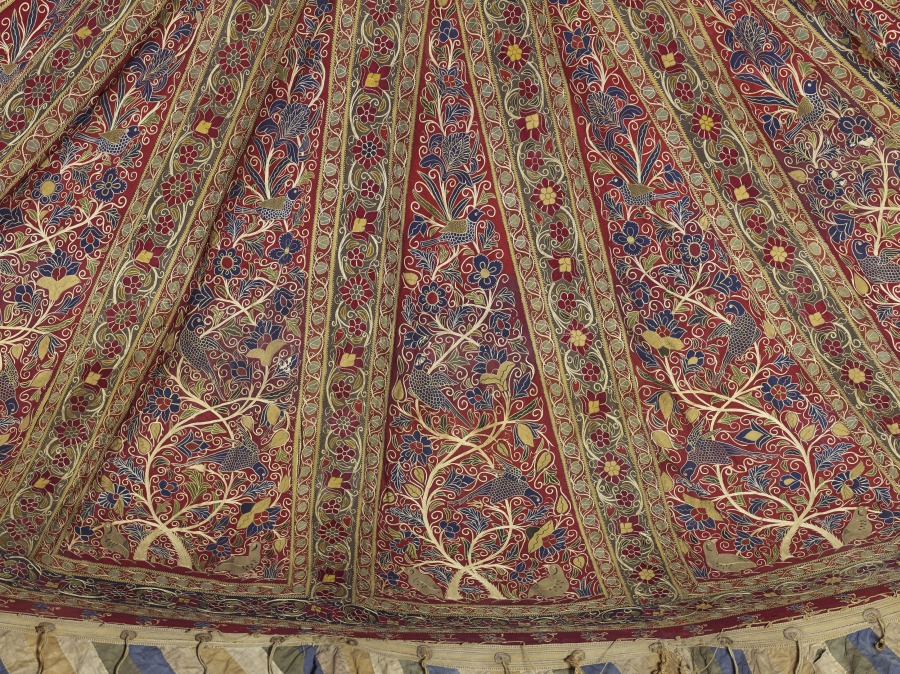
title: Royal Round Tent made for Muhammad Shah (Roof)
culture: Iran, Rasht, Qajar period (1779-1925)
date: 1834–48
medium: Interior: wool: plain weave, inlaid work; silk: embroidery, chain stitch; tape, leather; Exterior: cotton, wool: plain weave; rope, iron ring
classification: Textile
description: Royal tents were potent symbols of authority, wealth, and power throughout the greater Middle East. Rulers owned thousands of tents. They were used for shelter, shade, and innumerable functions in tent compounds that were essential for imperial ceremonies, travel, and military campaigns. Distinguished by size with elaborately decorated interior walls and ceilings, tents could be as large as castles. Opulent tents were also presented as imperial gifts. Tents are only known through documents before 1600. For example, in Baghdad in 809, Caliph Harun al-Rashid owned 4,000 ceremonial tents and 150,000 camping tents that were stored in the imperial Abbasid treasury. An astonishing variety and quantity of tents were housed in the royal Fatimid tent storeroom in Cairo in 1068-69, including "military tents, fortress tents, and castle tents, manufactured of . . . gold-brocaded stuff embroidered with designs of elephants, wild beasts, horses, peacocks, birds." Since 1600, Ottoman Turkish tents with elaborate floral decoration have been preserved in Istanbul in the Topkapi Palace Museum and Military Museum, and in European collections as war booty, primarily from the Ottoman Turks' attempt to conquer Vienna in 1683. These tents are not done in the Rasht technique, but rather are applique. In contrast, royal tents from Iran are extremely rare. This spectacular ceremonial tent is embroidered with the name of its owner, Muhammad Shah, who ruled Iran from 1834 to 1848 during the Qajar dynasty. The radiant jewellike interior features exuberant flora, blossoming vines, and robust birds made with colored wool embellished with silk-thread embroidery.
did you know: Rasht work is named after the city on the Caspian Sea in present-day Iran, which was a major silk trade center with numerous textile workshops.